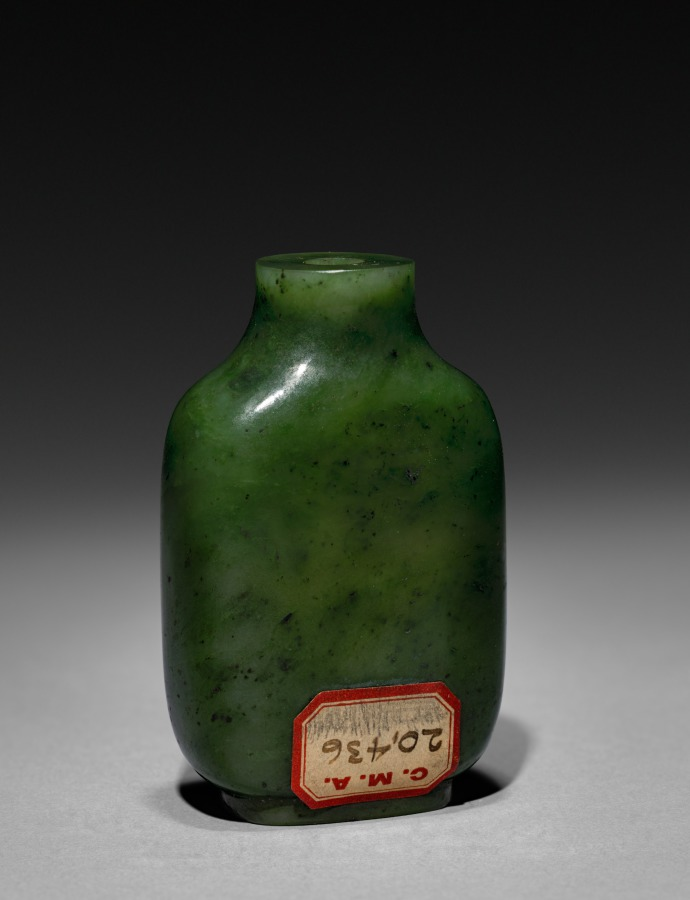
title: Snuff Bottle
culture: China, Qing dynasty (1644-1911)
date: 1644–1911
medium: glass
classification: Glass